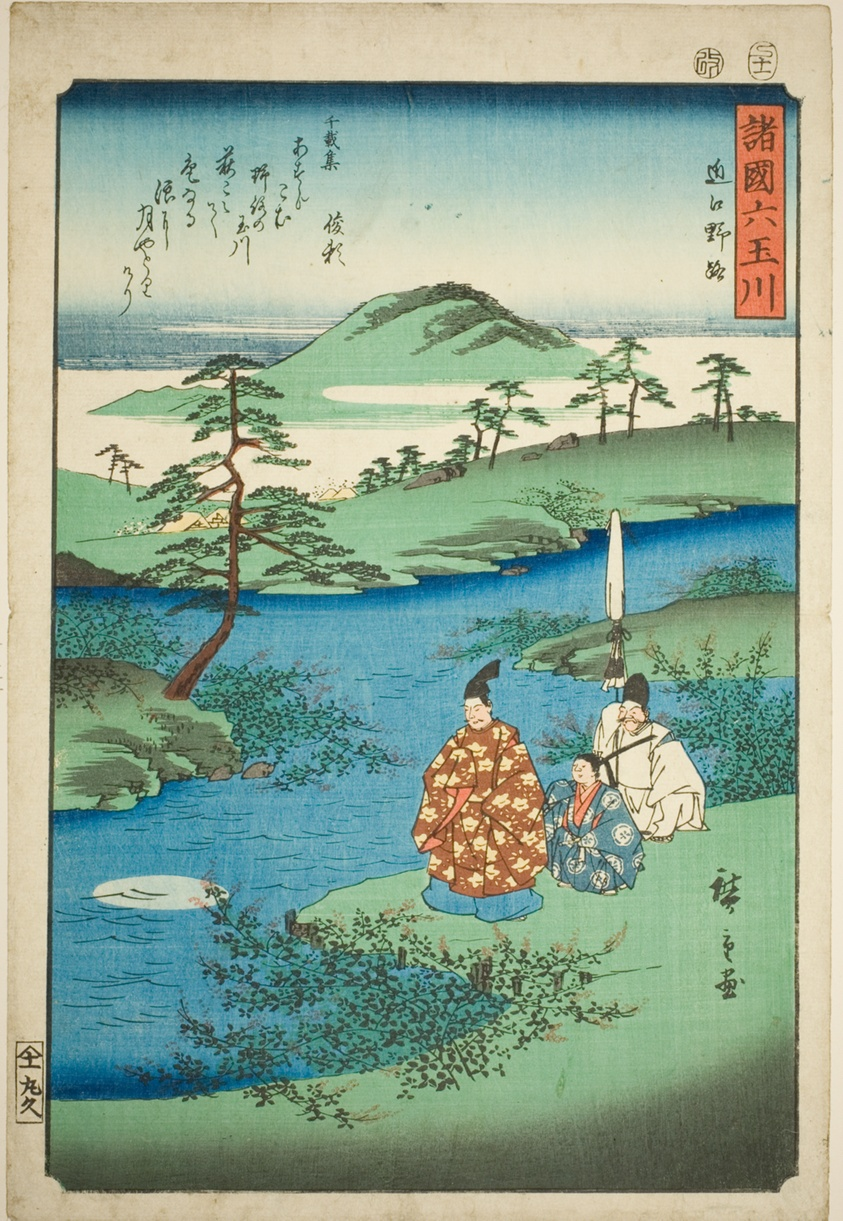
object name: Print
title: The Noji Jewel River in Omi Province (Omi Noji), from the series "Six Jewel Rivers in the Various Provinces (Shokoku Mu Tamagawa)"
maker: Utagawa Hiroshige 歌川 広重; Japanese, 1797-1858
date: 1857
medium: Color woodblock print; oban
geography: Japan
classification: woodblock print; print; asian art